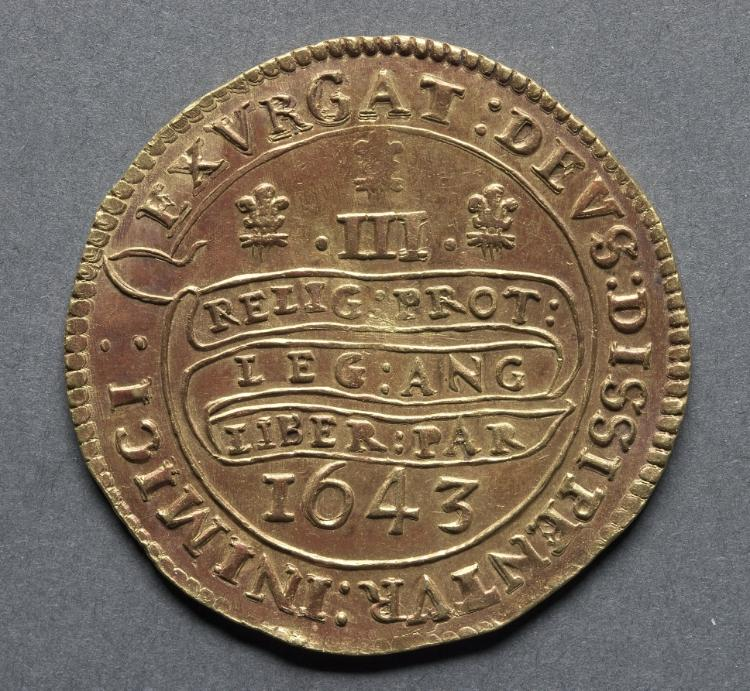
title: Triple Unite or Three Pound Piece: Declaration on Scroll with Three Plumes (reverse)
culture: England, Charles I, 1625-1649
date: 1643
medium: gold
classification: Coins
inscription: RELIG . PROT. LEG. ANG. LIBER. PAR 1643.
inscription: EXURGAT DEUS DISSIPENTUR INIMICI